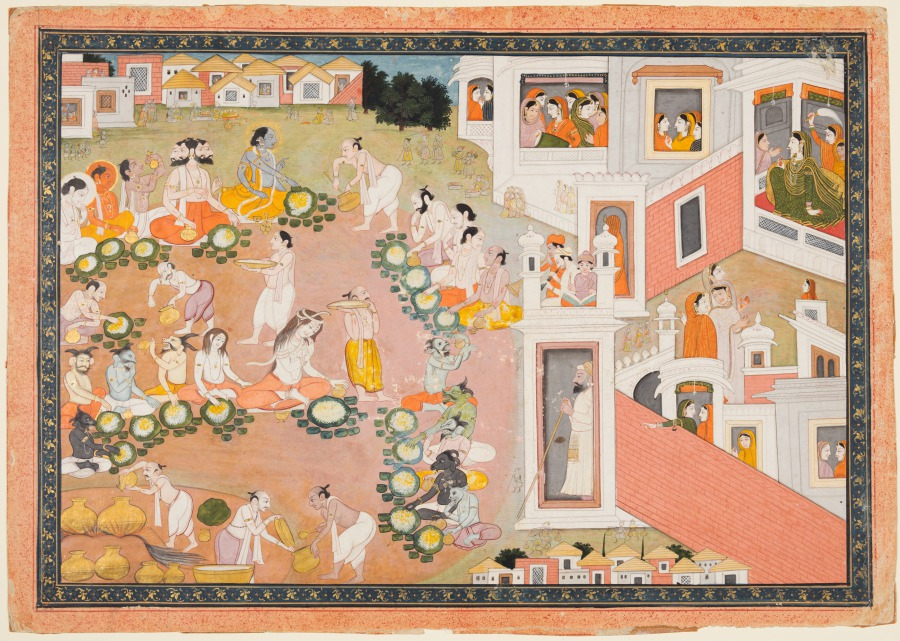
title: Feast where Vishnu decides he will incarnate as King Dasharatha’s sons, from Chapters 14–15 of the "Bala Kanda" (Book of Childhood) of a Ramayana (Rama’s Journey)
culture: Northern India, Pahari kingdoms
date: c. 1810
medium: Gum tempera and gold on paper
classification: Painting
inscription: [[verso]] vāla[kānda] 17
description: The women’s quarters of a palace occupy the right side of the composition. In the courtyard to the left, gods, including the blue Vishnu, four-headed Brahma, Surya (Sun), Chandra (Moon), Indra with eyes all over his body, and Shiva with snakes in his hair who sits with his minions, feast on food served on plates and bowls of leaves. Vishnu and Indra have taken off their crowns for the meal; the crowns are guarded on raised platforms in the background. The Pahari artist has depicted Dhaam, a local feast prepared by hereditary priest-chefs in accordance with strict Hindu rules of nutritional purity.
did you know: Vishnu and Indra have taken off their crowns for the meal; the crowns are being guarded on raised platforms in the background.